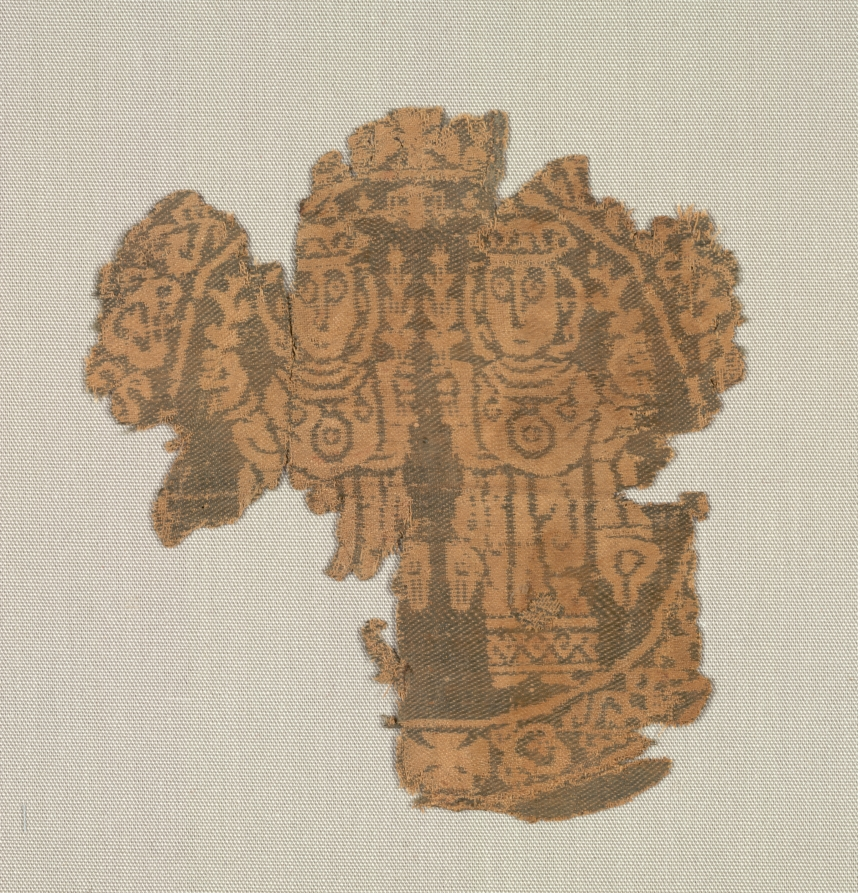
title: Fragmentary Roundel, Segmentum from a Tunic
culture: Syria, Akhmim, late 8th - early 9th centuries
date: late 700s–early 800s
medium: compound twill, silk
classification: Textile